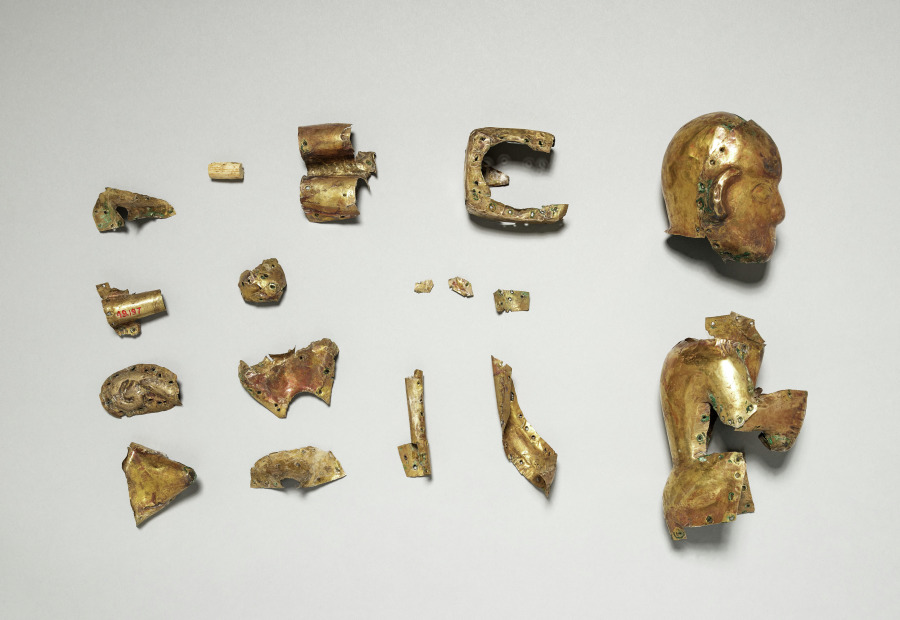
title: Monkey Finial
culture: Peru, North Coast, Sicán or Chimú, 9th-15th Century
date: c. 800–1470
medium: hammered and embossed gold alloy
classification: Metalwork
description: This three-dimensional sculpture constructed of sheet gold may have served as the finial for a staff or baton. It represents a monkey holding a fruit.